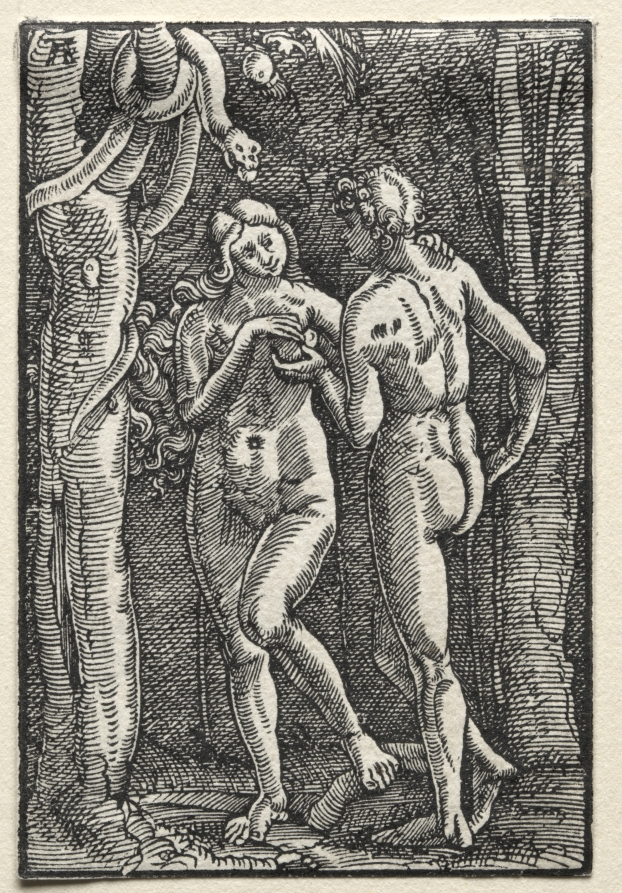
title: The Fall and Redemption of Man: Adam and Eve Eating the Forbidden Fruit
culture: Germany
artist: Albrecht Altdorfer (German, c. 1480–1538)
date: c. 1515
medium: woodcut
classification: Print